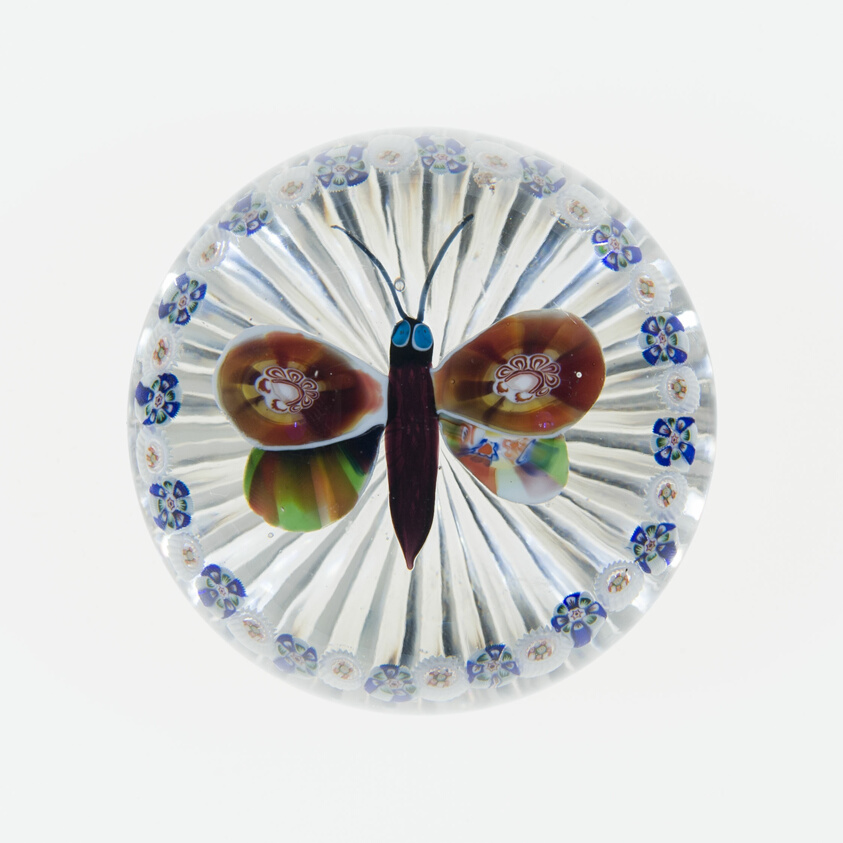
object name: Glass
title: Paperweight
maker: Baccarat Glassworks (Cristalleries de Baccarat); Lorraine, France, founded 1764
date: c. 1845–60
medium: Glass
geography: Baccarat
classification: paperweight; glass